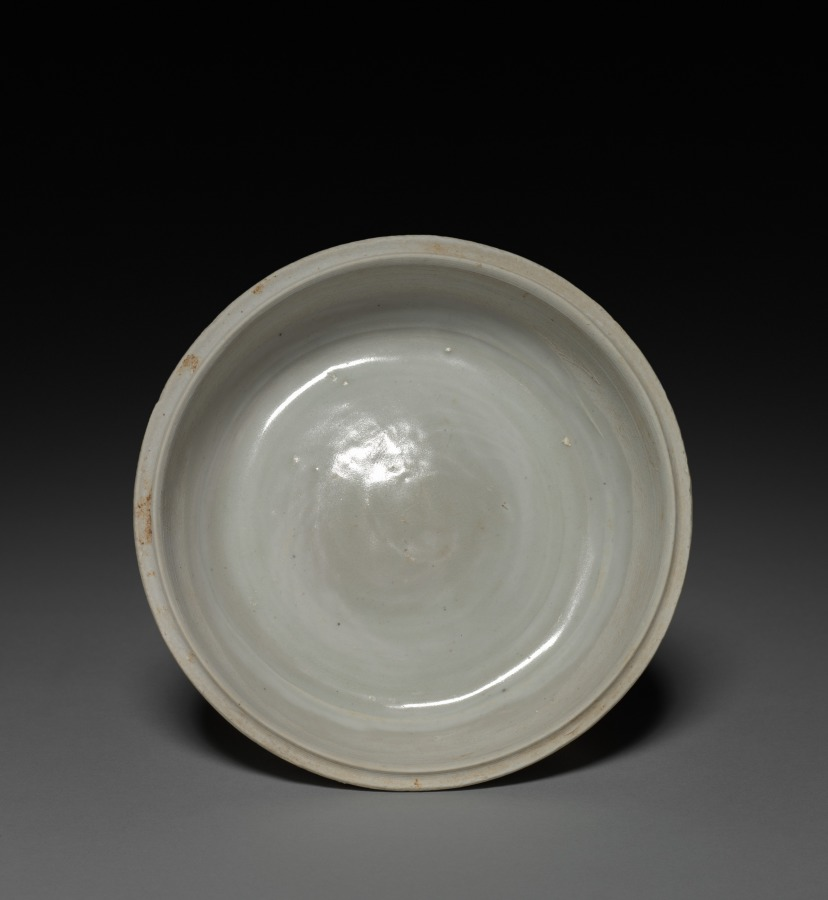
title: Round Covered Box with Floral Scrolls in Relief: Qingbai type Ware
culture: China, Fujian province, Anxi xian, Yuan dynasty (1271-1368)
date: 1300s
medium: glazed porcelain with slip decoration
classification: Ceramic